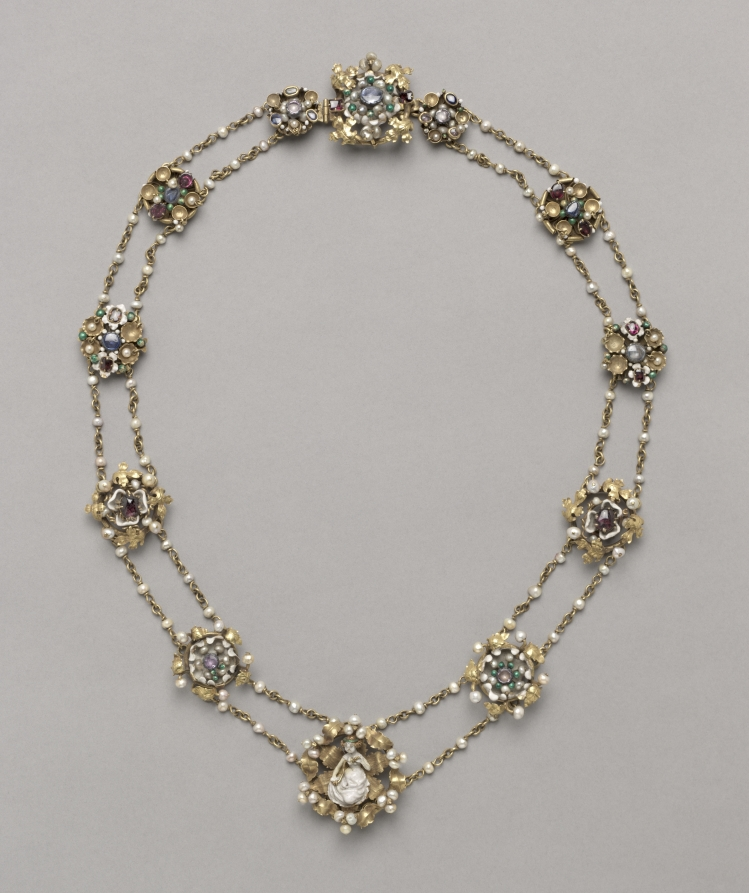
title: Twelve Medallions Mounted as a Necklace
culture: France, Paris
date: c. 1400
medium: enameled gold, precious stones, and pearls; some later additions with modern chain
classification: Jewelry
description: These medallions, which have loops on the backs, must have originally been sewn onto a garment or, more likely, a woman’s headpiece. In spite of the modern chain to which they are now attached, the medallions are unique items of feminine apparel from around 1400. Such items would have been well known at the courts of the Valois in Paris, Bourges, and Dijon. The central medallion with a “white lady” is enameled “in the round”––a new Parisian technique for enameling irregular or three-dimensional surfaces. Such white lady medallions are described in inventories of the period